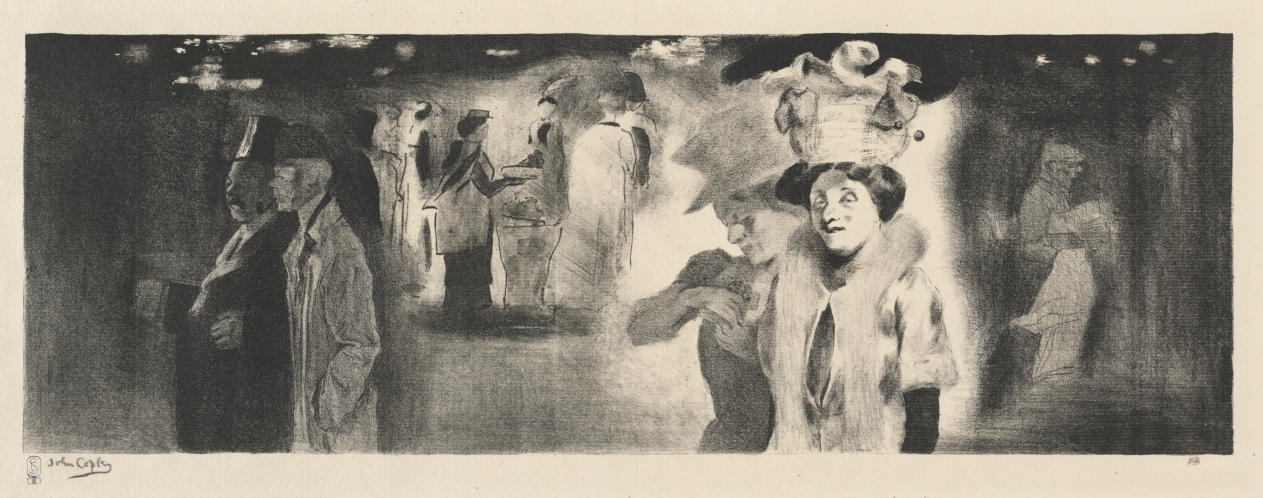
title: A Night Scene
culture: England, 20th century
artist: John Copley (British, 1875–1950)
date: 1910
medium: lithograph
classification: Print